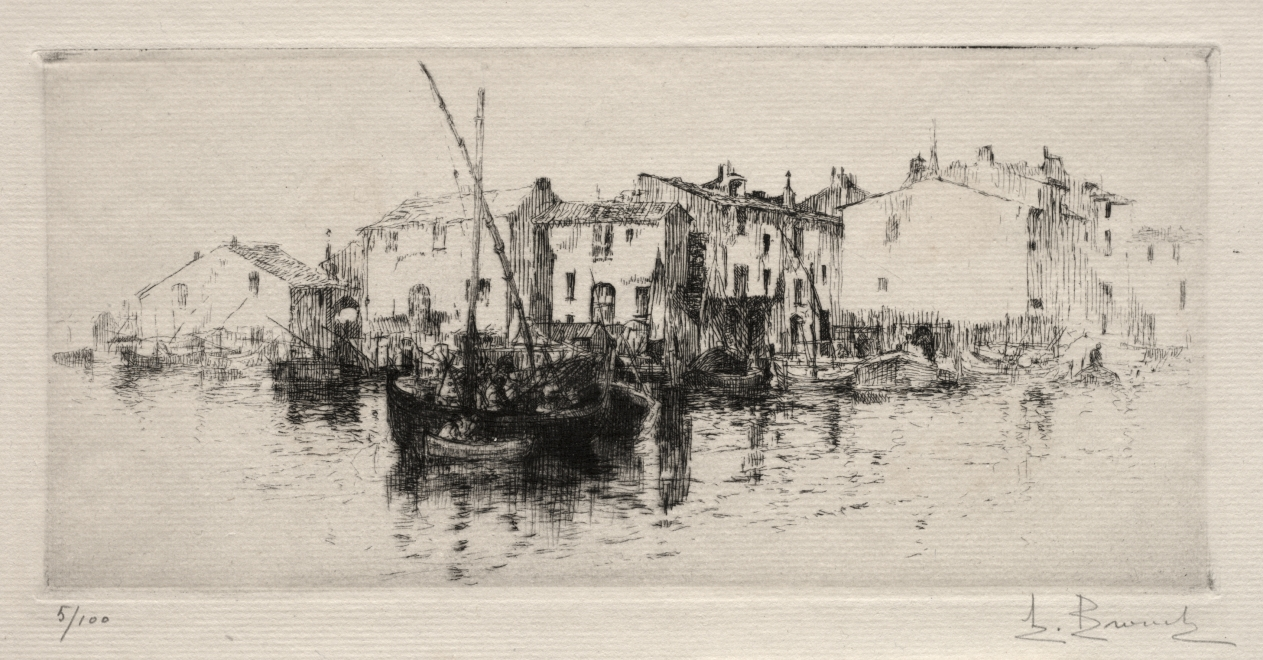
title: Les Martigues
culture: France, 20th century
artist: Auguste Brouet (French, 1872–1941)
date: before 1925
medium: etching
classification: Print